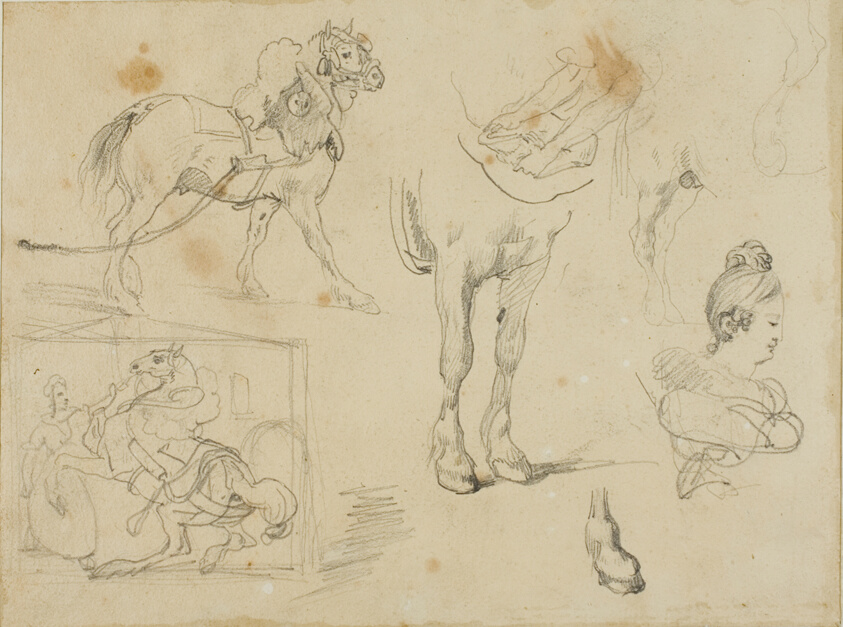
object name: Drawing and Watercolor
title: Studies of a Draught Horse, a Blacksmith and a Young Woman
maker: Jean Louis André Théodore Géricault (French, 1791-1824)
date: 1813/14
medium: Graphite, on cream wove paper, perimeter mounted on ivory laid paper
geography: France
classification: graphite; drawings (visual works); prints and drawing